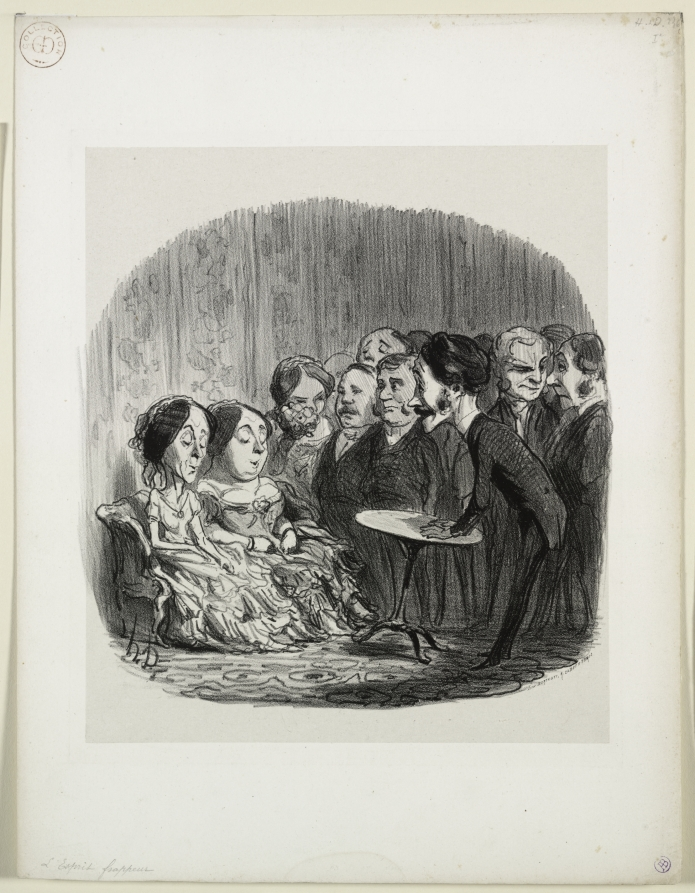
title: Rapping Spirits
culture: France, 19th century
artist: Honoré Daumier (French, 1808–1879)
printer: Bertauts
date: 1851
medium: lithograph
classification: Print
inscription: Upper margin: brown stamp / [in pencil] H.D. D 236 / I ; lower margin, in pencil: L'Esprit Frappeur. / Purple stamp ; lower right, printed: Lith. Bertauts, R. Cadet 11 Paris